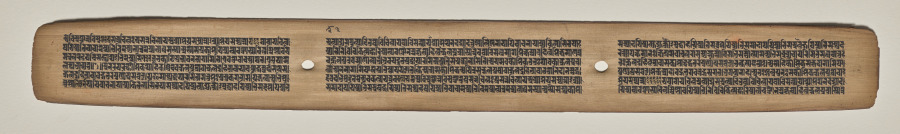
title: Text, folio 42 (recto), from a Manuscript of the Perfection of Wisdom in Eight Thousand Lines (Ashtasahasrika Prajnaparamita-sutra)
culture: Eastern India, Bihar, Vikramashila Monastery. Painting: Nepal, Kathmandu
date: Sunday, September 14, 1119 (year 239 of the Newar Samvat in the month of Ashvina)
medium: gum tempera and ink on palm leaves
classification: Painting